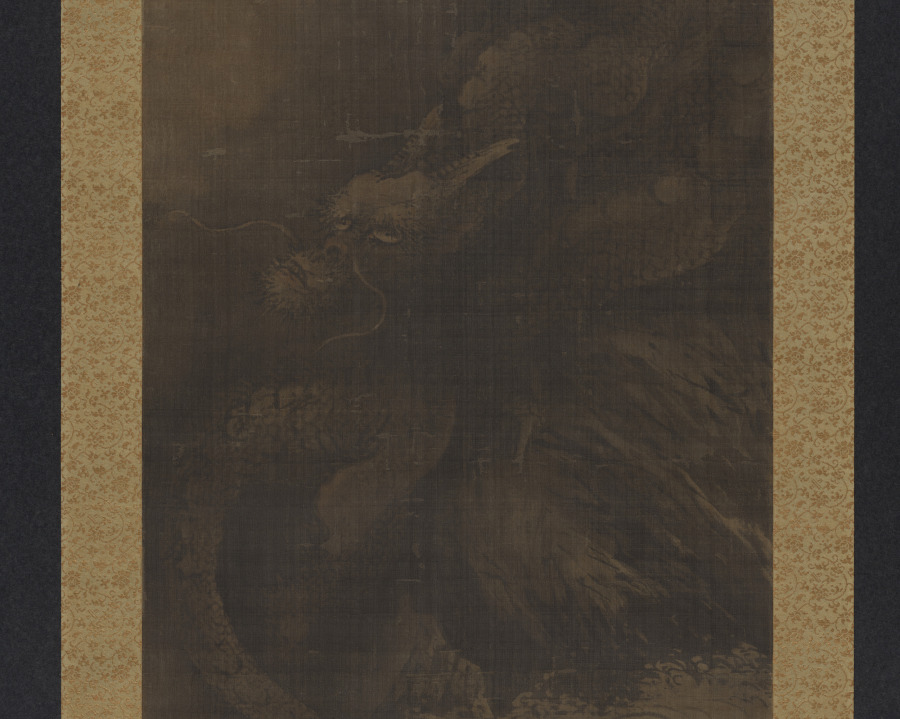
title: Dragon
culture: China, Southern Song dynasty (1127-1279)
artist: Fachang Muqi (Chinese, 1220–1280)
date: c. 1250–79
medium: Hanging scroll; ink on silk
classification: Painting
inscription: 道有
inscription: 雜華室印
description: The dragon and tiger are tied to the philosophical concept of yin and yang, which describes opposite but complementary forces. The dragon occupies a tiered background of waves and mist. Its luminous head emerges from the darker passages, and its narrow twisting body is serpent-like. By contrast, the close-up view of the tiger emphasizes its bulk. The tiger bends its head to lick its paw while its tail curls in the foreground. In their original Chan Buddhist context, this pair of scrolls likely flanked a central image, like the Bodhisattva Guanyin. The silk has darkened over the centuries, and the slight reddish shading in the tiger’s tongue and nose has faded.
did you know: Fachang Muqi was a Chinese Chan Buddhist monk and painter.